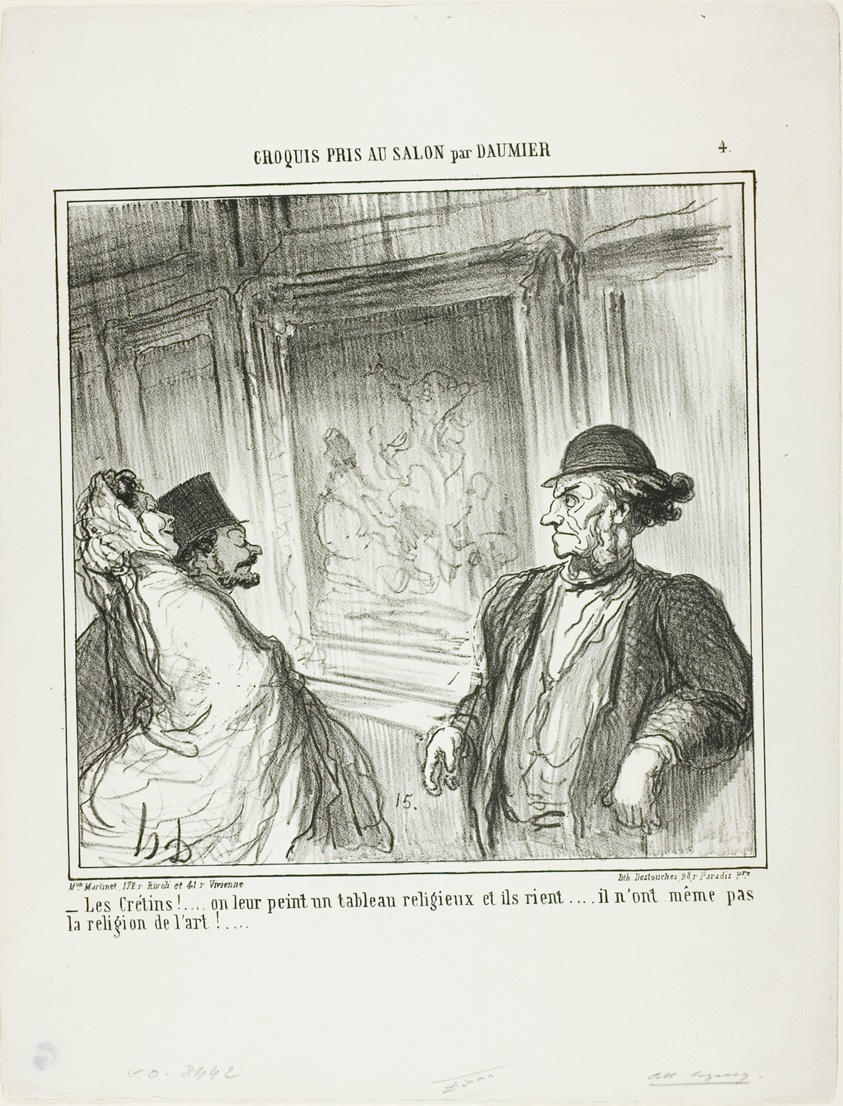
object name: Print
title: “What idiots! You paint a religious picture for them and they laugh.... they don't even have a devotion to art!...,” plate 4 from Croquis Pris Au Salon par Daumier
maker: Honoré Victorin Daumier; French, 1808-1879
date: 1865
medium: Lithograph in black on white wove paper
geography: France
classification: lithograph; print; prints and drawing